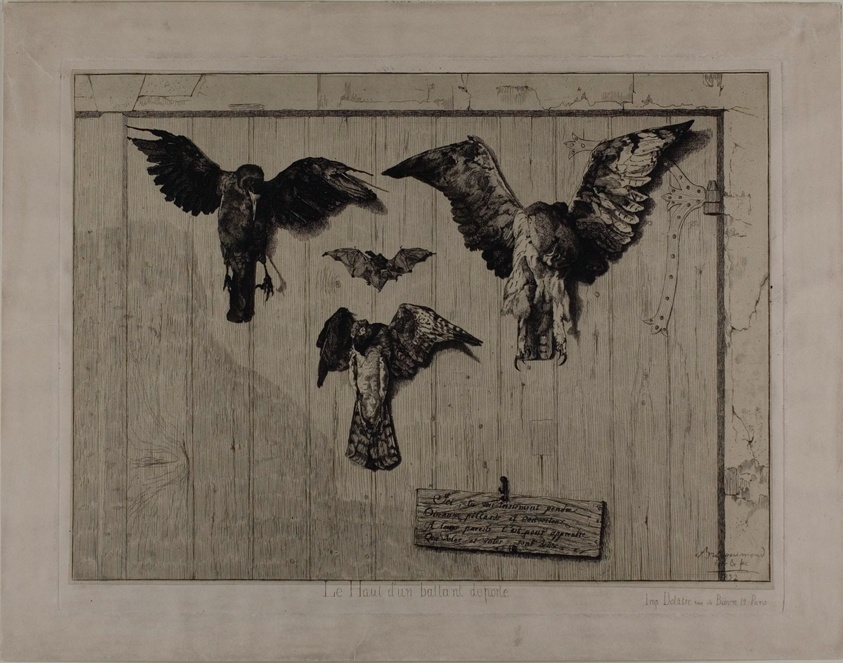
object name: Print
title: The Upper Part of a Door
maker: Felix Bracquemond; French, 1833–1914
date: 1852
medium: Etching and drypoint on off-white laid paper, laid down on ivory wove paper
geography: France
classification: etching; print; prints and drawing